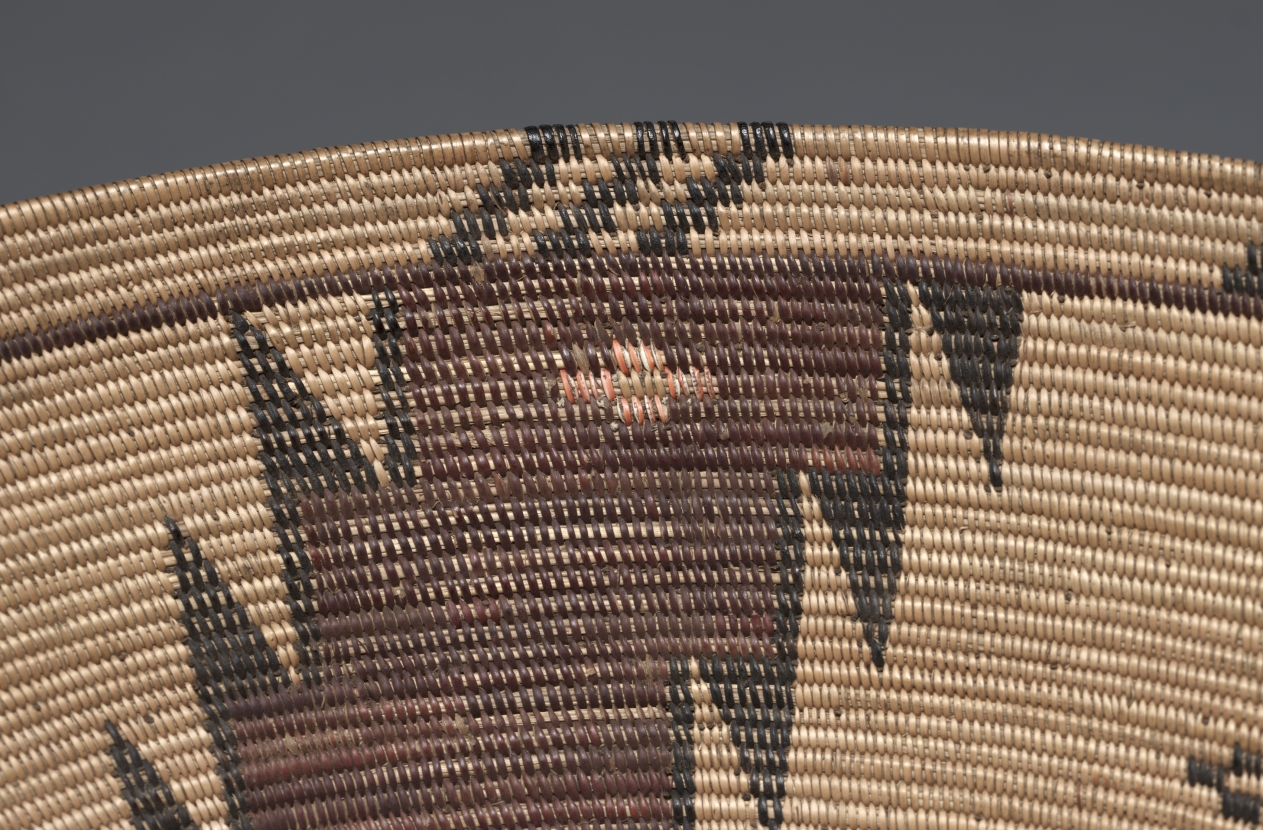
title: Presentation Bowl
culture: Native North America, Great Basin, California, Death Valley, Timbisha (Panamint) Shoshone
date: 1880–90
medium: devil's claw, sumac, yucca root, orange-shafted flicker (woodpecker) quills; coiled (2 rod and bundle of deer grass or basket grass)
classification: Basketry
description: This basket was made for the Euro-American collectors’ market in the early 1900s but it is modeled on basketry bowls from which the Timbisha (Panamint) Shoshone once served food. When used indigenously, the main view would have been of the interior. The two small, pink crosses, made of flicker (woodpecker) quills, may be a maker’s mark. Made-for-sale baskets testify to Indigenous women’s truly creative, resilient responses to forces that endangered their livelihoods and existence.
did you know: The two small, pink crosses on this basket may be a maker’s mark.